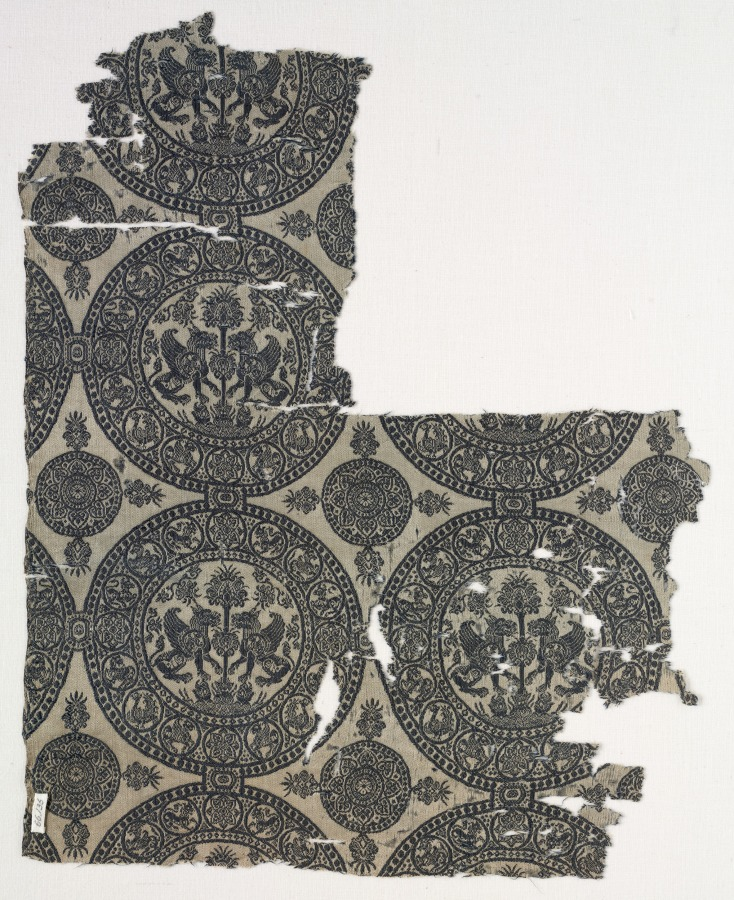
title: Fragments with Griffins in Roundels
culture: Iran or Iraq, in the style of the Seljuq period (1037–1194)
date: before 1966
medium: Silk: lampas weave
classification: Textile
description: This fragment consists of two almost complete roundels in lower right and fragment of third one at the left, plus parts of other roundels. In the roundels are a pair of confronted, winged griffins either side of a "palm" tree. Heavy baroque floral motifs fill the spaces between the main motifs and the roundel frame. The palm grows out of a curious foliate device at the bottom. The roundel frame has pearl borders between which are little circles about 2 cm. in diameter with a series of elegant tiny motifs beginning with a star at the four cardinal points and repeated, left and right, from top to bottom, are a lion, reclining winged ibex, reclining horned animal (possibly a bull), then center star on side, then winged griffin or goat (?), peacock, and lion regardant. In the interspaces are large circular motifs filled with stylized floral motifs and pendant floral motifs growing out in the four angles.